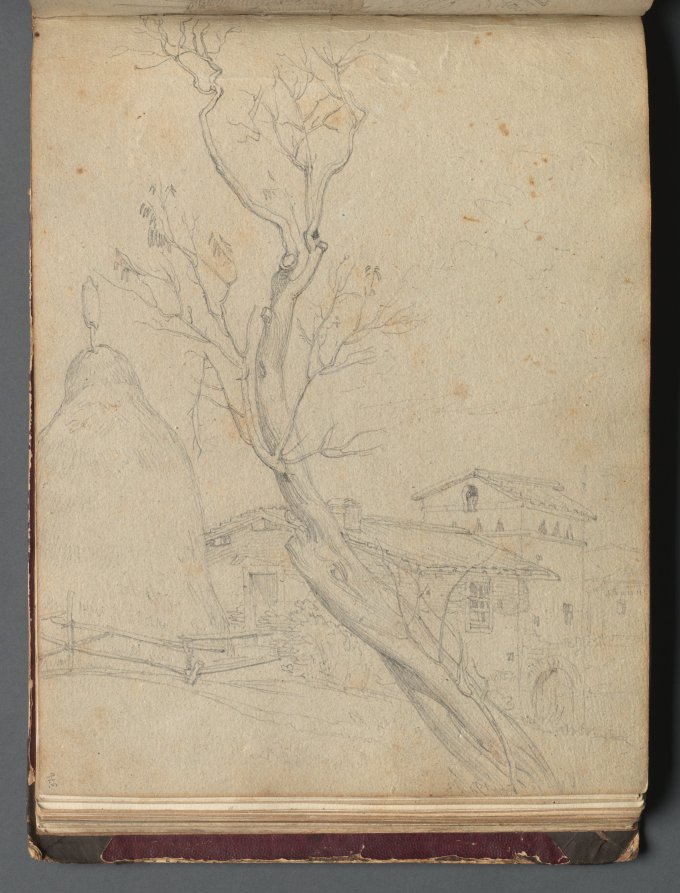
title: Album with Views of Rome and Surroundings, Landscape Studies, page 37b: Roman Landscape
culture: Germany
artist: Franz Johann Heinrich Nadorp (German, 1794–1876)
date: c. 1830s-70s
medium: graphite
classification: Bound Volume